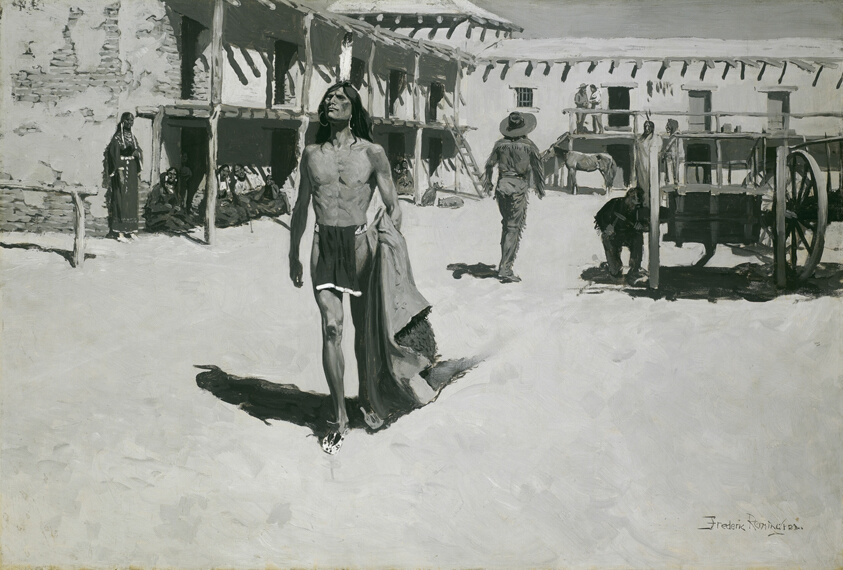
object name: Painting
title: Nothing But Cheerful Looks Followed the Bat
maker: Frederic Remington (American, 1861–1909)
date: c. 1900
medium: Oil on canvas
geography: United States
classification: painting; american arts